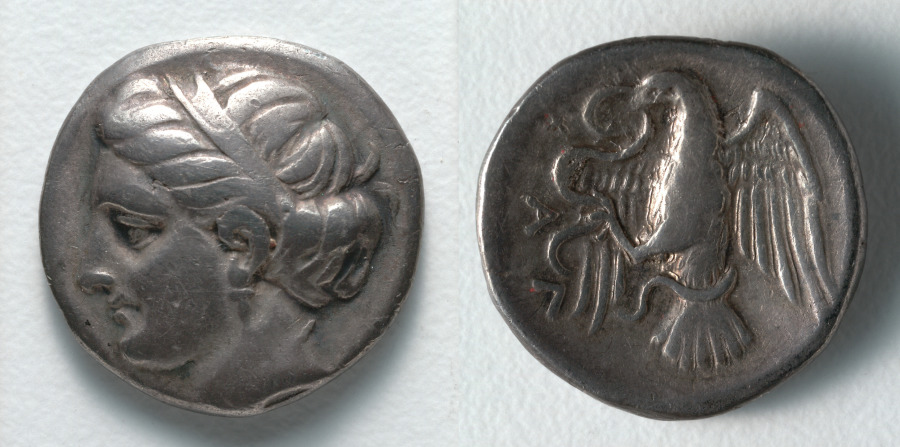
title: Drachm: Female Head (obverse); Eagle (reverse)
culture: Greek, minted at Chalkis (Euboia)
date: 337–308 BCE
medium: silver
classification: Coins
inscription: ΧΑΛ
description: Minted after a period of Athenian domination, this coin from Chalkis features two traditional symbols of its home island Euboia: a female head and an eagle battling a snake. What distinguishes this issue from earlier types, however, are the smooth, rounded face and deep-set eyes of the woman on the obverse, who may represent the goddess Euboia herself.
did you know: On the reverse is Chalkis’s 3-letter abbreviation ΧΑΛ (CHAL).